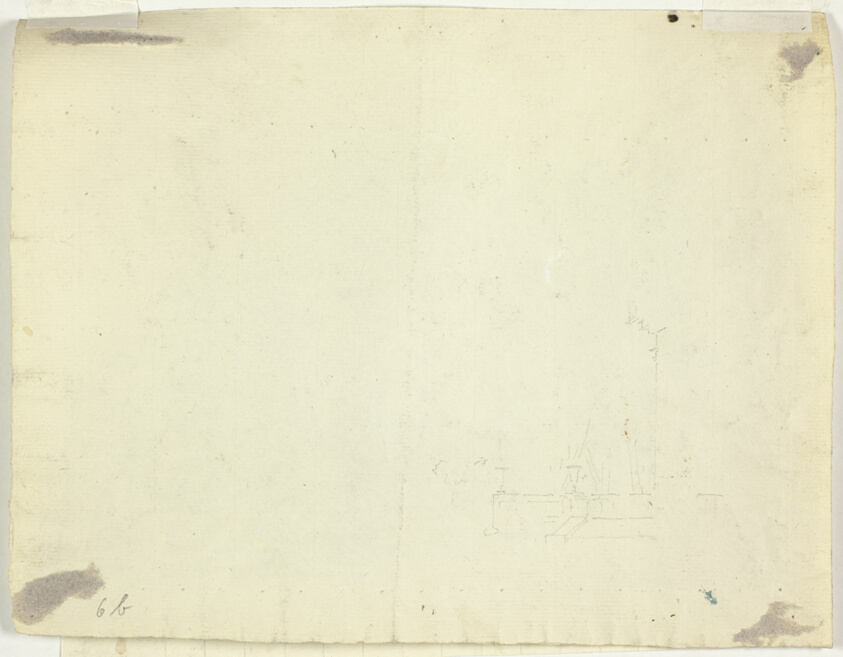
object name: Drawing and Watercolor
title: Sketch of Arched Entry to a Terrace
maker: Pierre Antoine Mongin (French, 1761-1827)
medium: Graphite on cream laid paper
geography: France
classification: drawings (visual works); prints and drawing